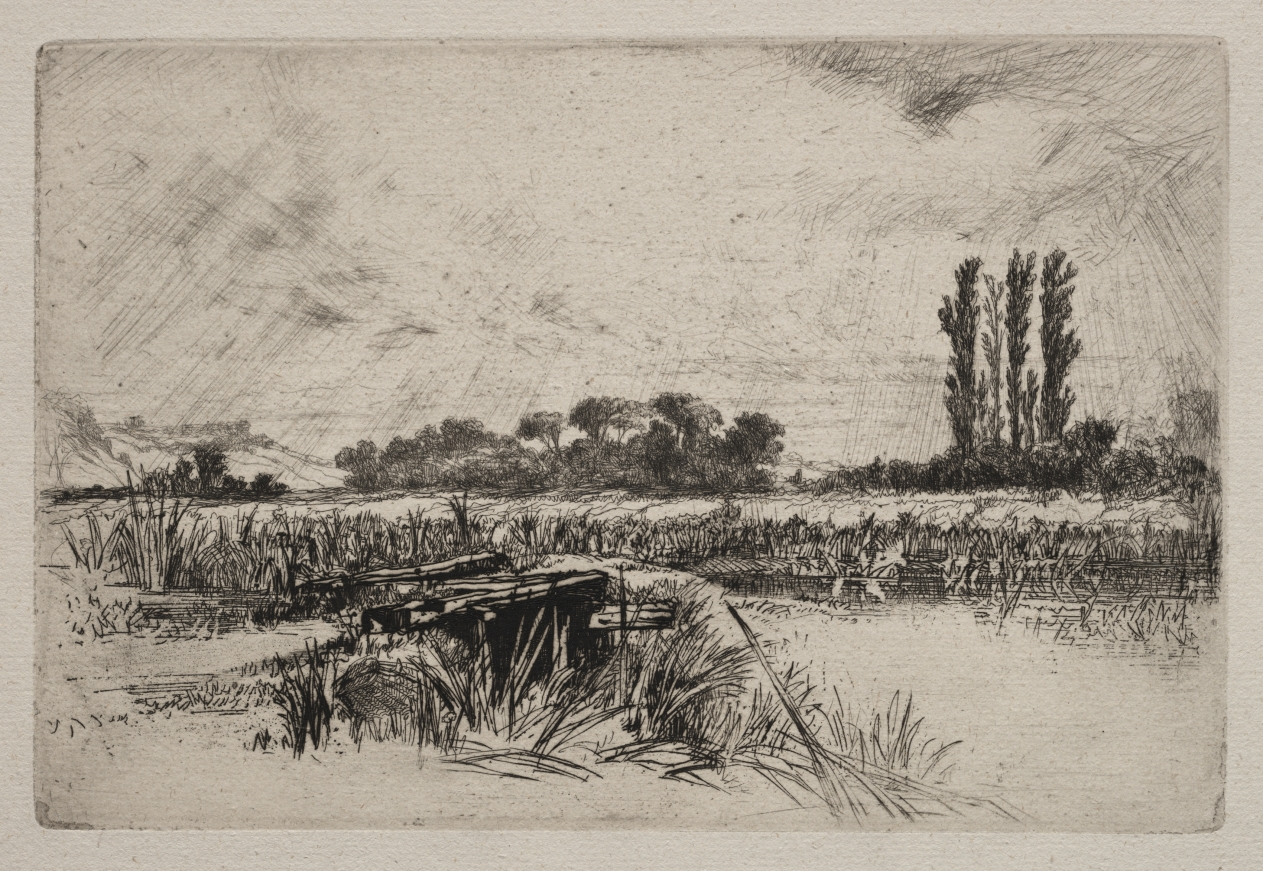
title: A Water Meadow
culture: England, 19th century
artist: Francis Seymour Haden (British, 1818–1910)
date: 1859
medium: etching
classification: Print